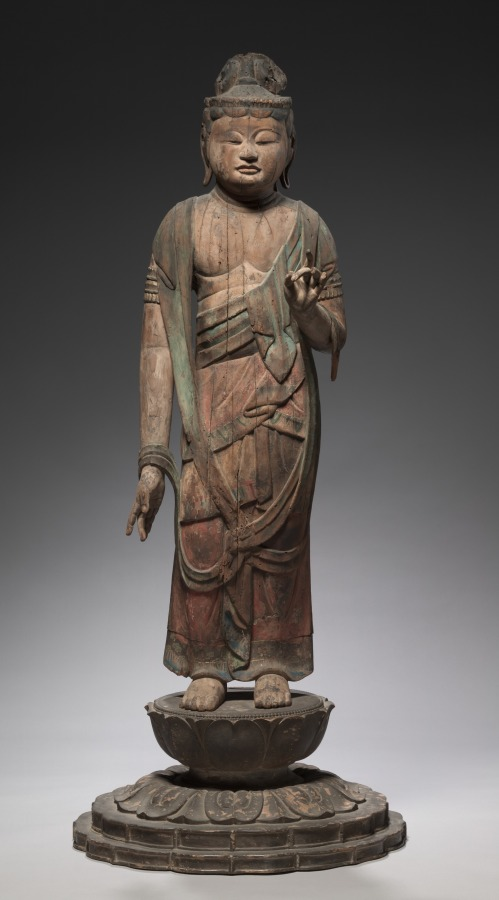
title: Shō Kannon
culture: Japan, Heian period (794–1185)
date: 900s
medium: Wood with traces of color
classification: Sculpture